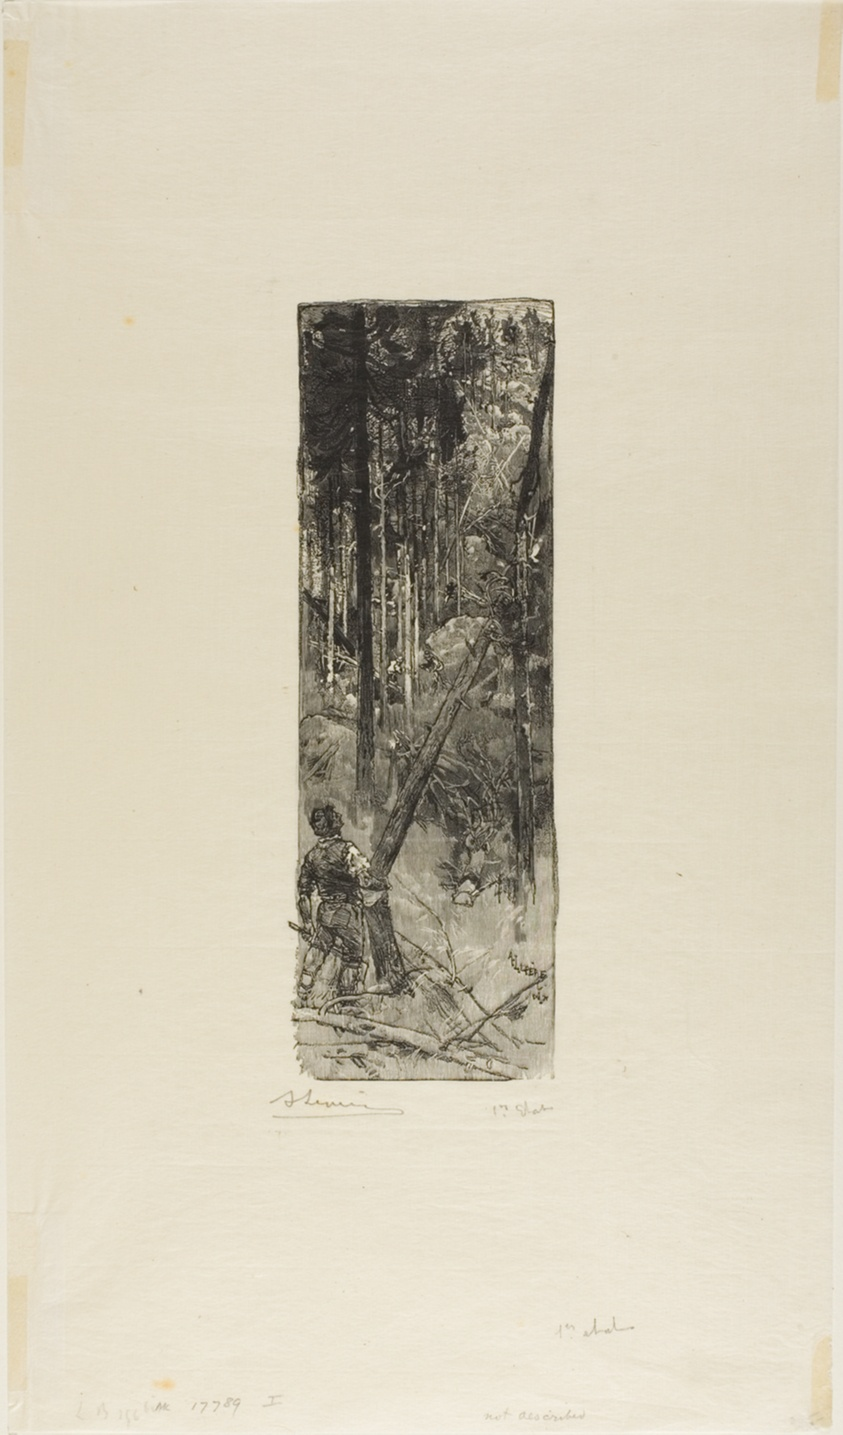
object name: Print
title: Falling Pines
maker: Louis Auguste Lepère (French, 1849-1918); published by A. Desmoulins (French, active c. 1908-1910)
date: published 1908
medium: Wood engraving in black on cream laid Japanese paper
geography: France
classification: wood engraving; print; prints and drawing